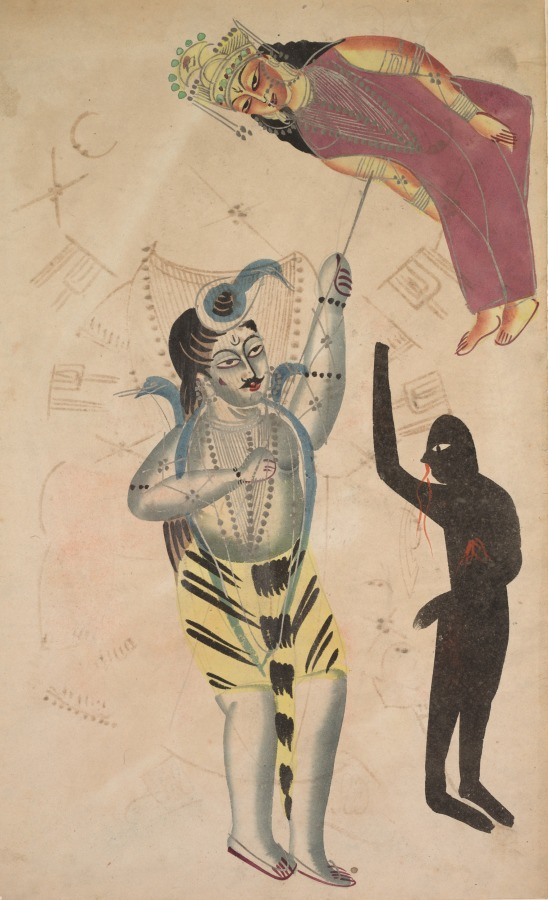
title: Shiva Bearing Aloft the Body of His Sati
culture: Eastern India, Bengal, Kolkata, Kalighat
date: c. 1890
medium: Gum tempera, graphite, ink, and tin on paper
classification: Painting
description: This unusual image portrays Shiva holding aloft the corpse of his wife Sati with his trident. Sati immolated herself because of the hostility directed toward her husband Shiva by her father Daksha. The shadowy figure with blood emerging from the nose and heart is reminiscent of images of death (mrtu pat) found among the magic painter-minstrels (jada patua) of the Santal tribals of Bihar. The shadow is missing its right hand. In this connection, Shiva carried his wife until Vishnu cut the body into pieces that fell onto the earth and were made into shrines. The provocative title given to the piece when it was acquired was Shiva Bearing Aloft the Body of His Spouse Who Has Died in Childbirth. There is, however, no evidence of a myth concerning this theme, thus making this piece even more unusual.